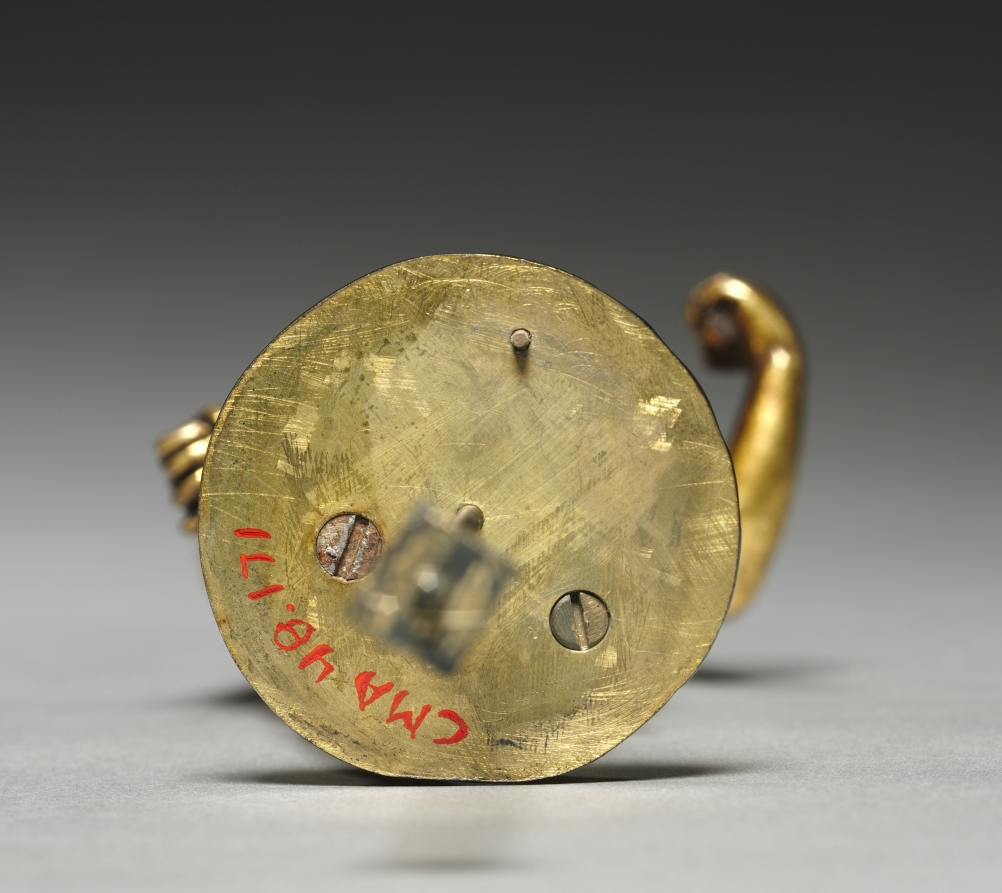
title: Venus with a Burning Urn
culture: Northern Italy, 16th century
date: c. 1500–1520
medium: gilt bronze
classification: Sculpture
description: Venus is the Roman goddess of many virtues, including Love, Charity, Fertility, and Victory. Here, Venus is represented as the goddess of Charity. She wears a crown, as Charity is often depicted as the Queen of the Virtues. The flaming lamp in Venus's left hand was also a symbol of Charity in Venice, where this piece is thought to have originated. The bent fingers of her right hand are bent suggest that Venus may have once held another object. Renaissance sculptors often looked back to antiquity when producing monumental and small bronze statues. The small bronze cabinet piece comes into Italian art during this time, bringing ancient gods and goddesses into Italian households. Venus stands in a contrapposto pose and, like Hellenistic and Roman objects, her locks are tied by a double ribbon while two curls fall on her shoulders. Her tilted head and large emotional eyes, as well as her small nose and parted lips reflect the influence of Hellenistic Greek facial styles.